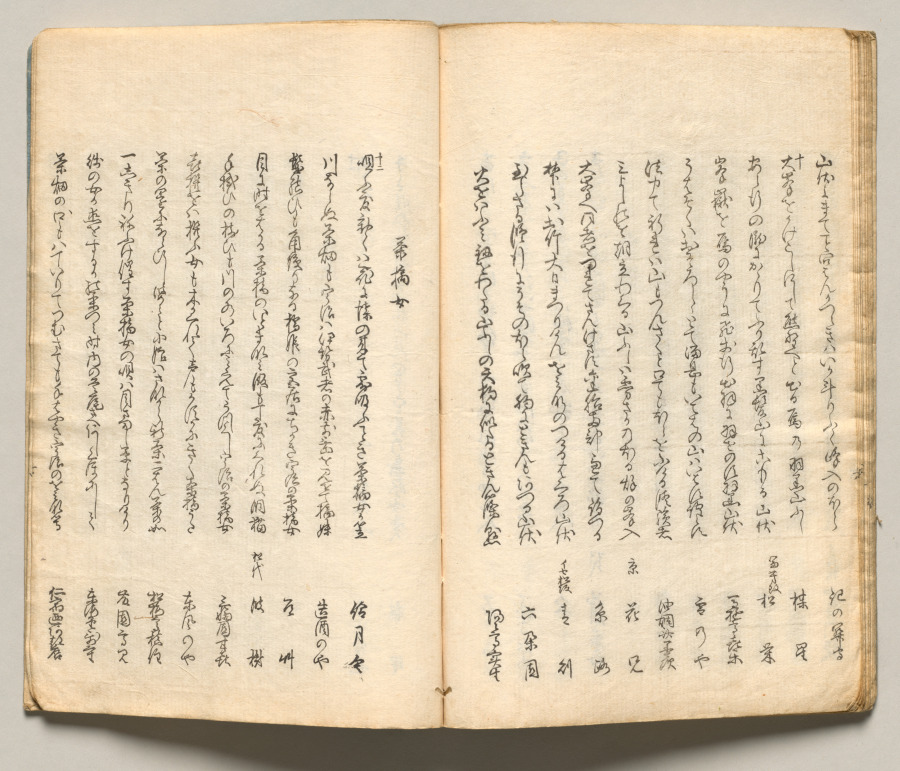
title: Spread Fifteen from Volume Seven of People of Japan in Light Verse (Kyōka)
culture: Japan, Edo period (1615–1868)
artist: Utagawa Hiroshige (Japanese, 1797–1858)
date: 1857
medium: Woodblock-printed book; ink and color on paper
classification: Bound Volume